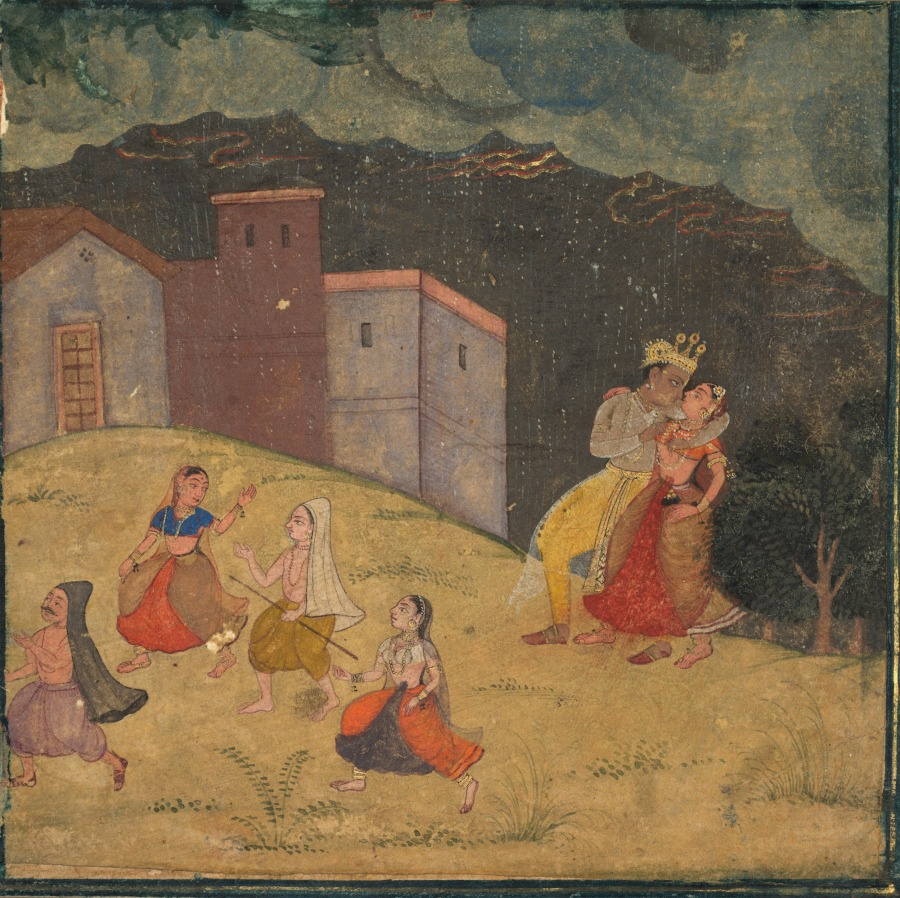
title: Radha and Krishna Caught in a Storm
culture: India, Mughal Dynasty (1526-1756)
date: c.1615–1620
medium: color on paper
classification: Painting